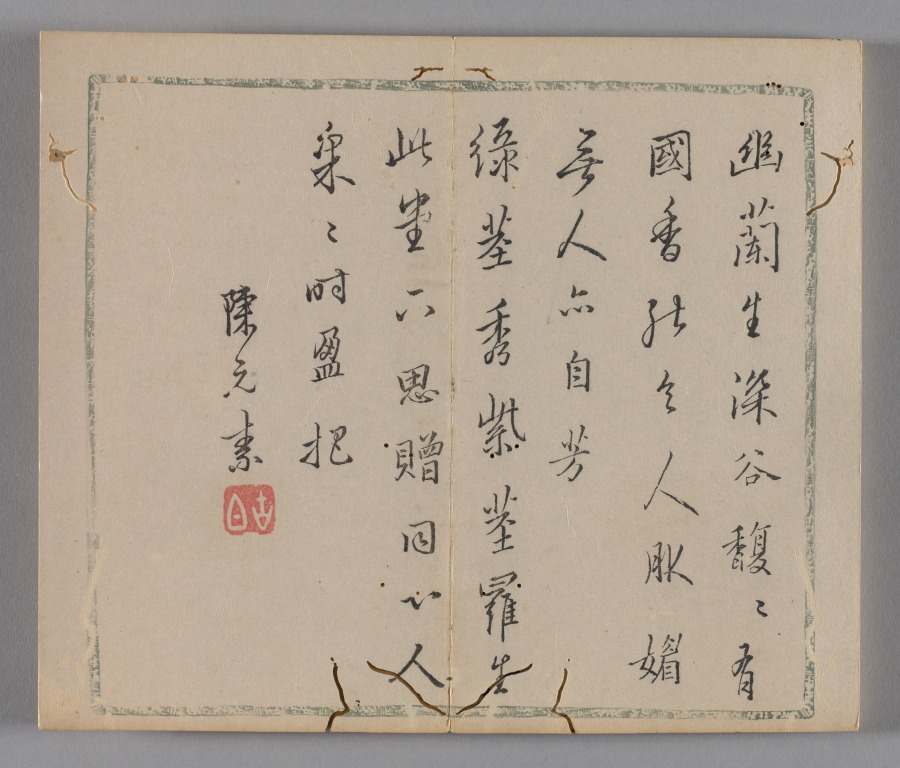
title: Ten Bamboo Studio Painting and Calligraphy Handbook (Shizhuzhai shuhua pu): Round Fans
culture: China, Qing dynasty (1644-1911)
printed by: Hu Zhengyan (Chinese, c. 1584–1674)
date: 1633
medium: Woodblock-printed book; ink and colors on paper; first edition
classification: Print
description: Color printing reached a level of perfection in the early 1600s, as seen in this Ten Bamboo Studio Collection of Calligraphy and Painting and the Mustard Seed Garden Manual of Painting (printed 1679 and 1701). The painterly quality, precision in registering (aligning) the woodblocks, and harmonious colors made them the most successful color print editions in Chinese history. Both editions were printed and compiled in Nanjing, spread nationwide, and had a great impact on the arts in Japan and Korea.